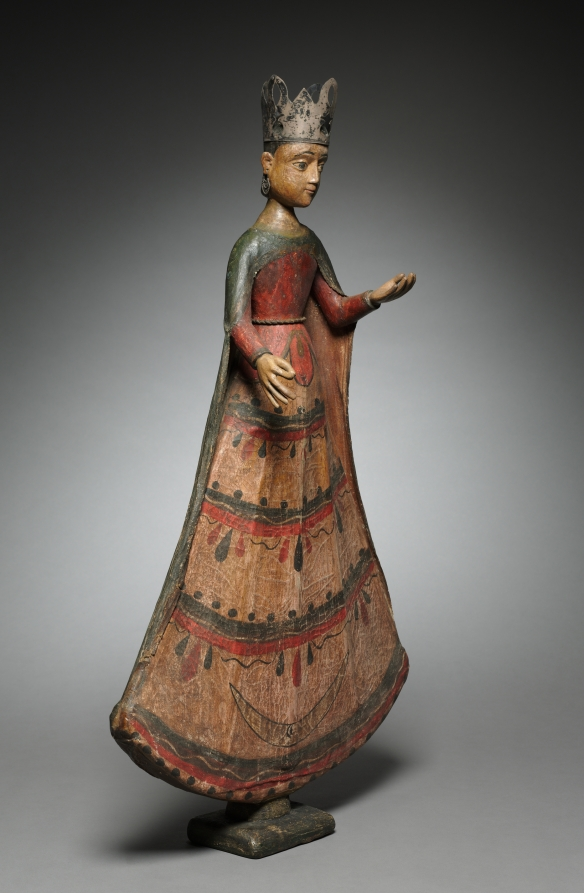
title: Santos: Virgin Crowned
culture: America, New Mexico, 19th century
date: 1800s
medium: painted wood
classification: Sculpture